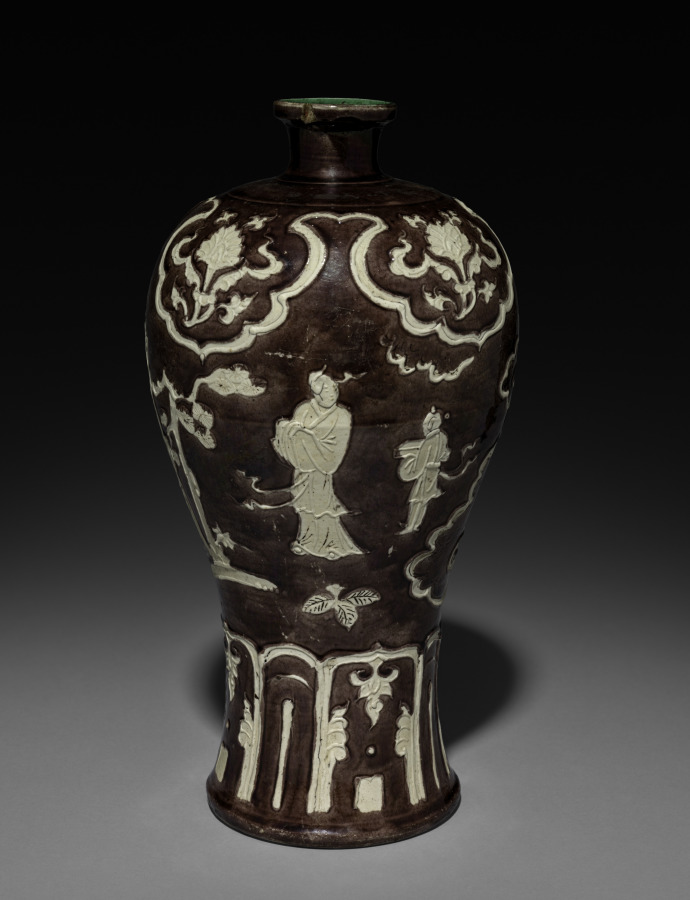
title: Vase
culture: China, Jiangxi Province, Ming dynasty (1368–1644)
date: late 1400s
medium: porcelain, Fahua ware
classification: Ceramic